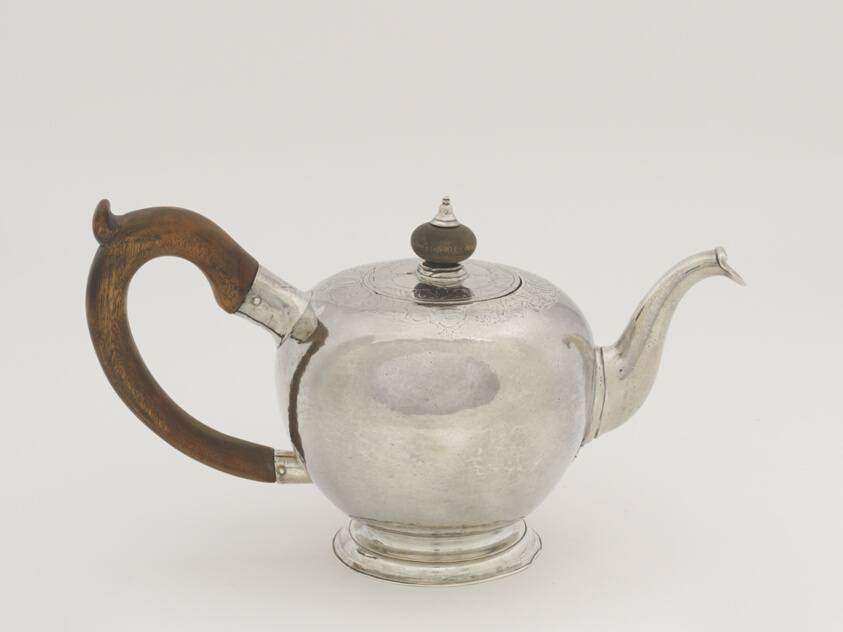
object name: Metalwork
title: Teapot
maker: Jacob Hurd; American, 1702/03–1758; Boston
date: 1740–55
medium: Silver and walnut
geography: Boston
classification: teapot; silver; american decorative arts; american arts; decorative arts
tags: dining, drinking